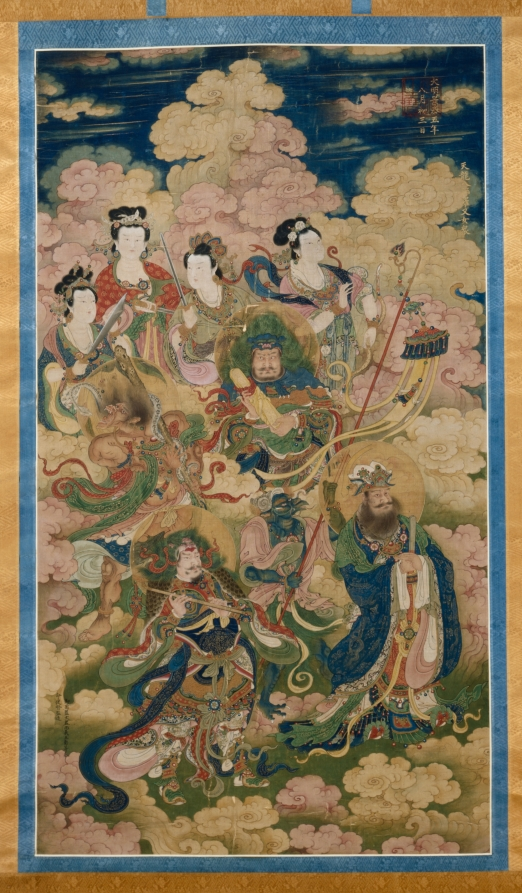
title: The Eight Hosts of Deva, Naga, and Yakshi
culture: China, Ming dynasty (1368–1644)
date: 1454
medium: hanging scroll; ink and color on silk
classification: Painting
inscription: 大明景泰五年八月初三日施 [印] 廣運之寳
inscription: 御用監太監尚義王勤等奉命提督監造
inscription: 天龍八部羅叉女衆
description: The grandest of the Buddhist mortuary rites is the Water-Land (shuilu) ritual. This esoteric ceremony is conducted for the salvation of “all souls of the dead on land and sea.” The ostentatious ritual was performed for imperial ancestors and high officials from the Song (960–1279) to the Ming dynasties and drew large crowds. On the second day of the weeklong ceremony, paintings are hung in the inner altar. This scroll represents the Eight Hosts of Celestial Nagas and Yakshis as described in the Lotus Sutra. Together with CMA 1973.70.1, it belongs to a set of 36 Water-Land ritual paintings that are the finest works of their types known from the Ming period. With their bright, opaque color and fine-line gilt decoration intact and unfaded, both paintings share a remarkable state of preservation.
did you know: The Naga is on the lower right dressed as a king with gold dragons on his blue robe.